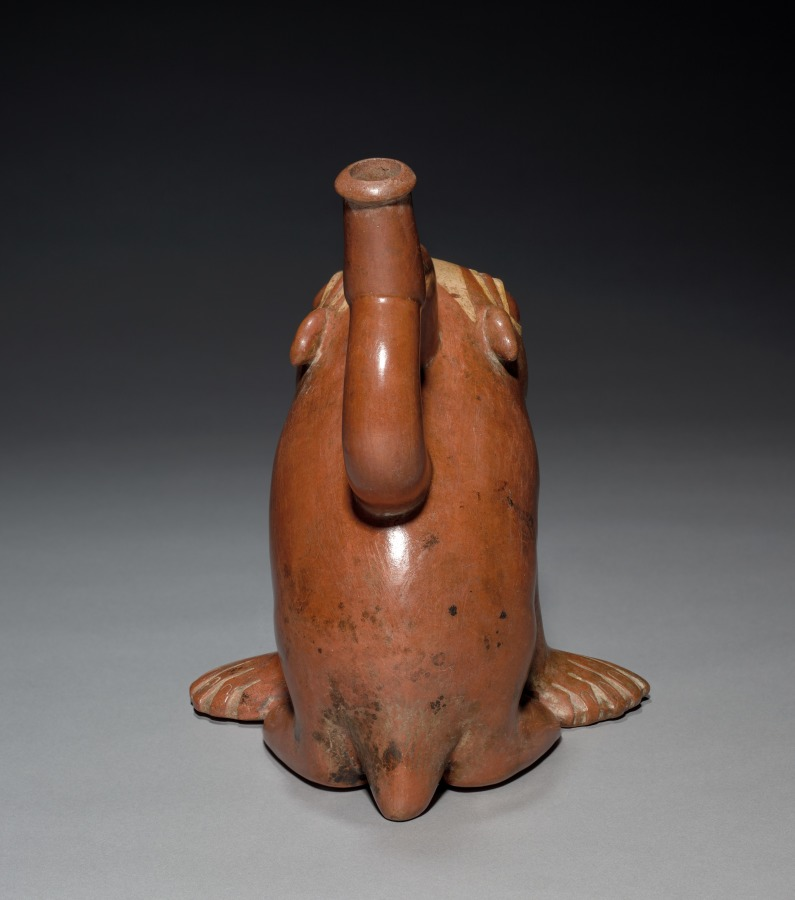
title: Sea Lion Pup Vessel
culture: Central Andes, North Coast, Moche people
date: 200–850 CE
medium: ceramic and slip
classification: Ceramic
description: Sea lions commonly appear in Moche art as effigy vessels, like this appealing pup, or in complex scenes that often show them as the targets of human hunters. They may have been prized in part for the beach pebbles found in their stomachs; modern Peruvian folk healers consider such pebbles to have powerful medicinal qualities. Also, colonial-period natives believed that sea lions carried the dead to off-shore islands, an idea that could date to Moche times.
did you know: Moche potters were skilled at producing charming images using only red and white slip.